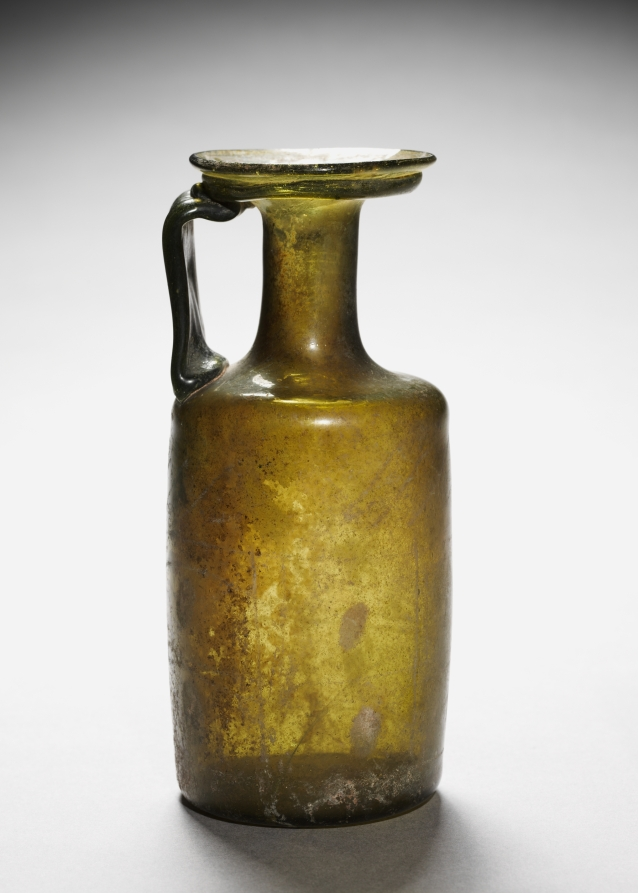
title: Pitcher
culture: Syro-Palestinian, Roman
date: 200–400 CE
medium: glass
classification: Glass